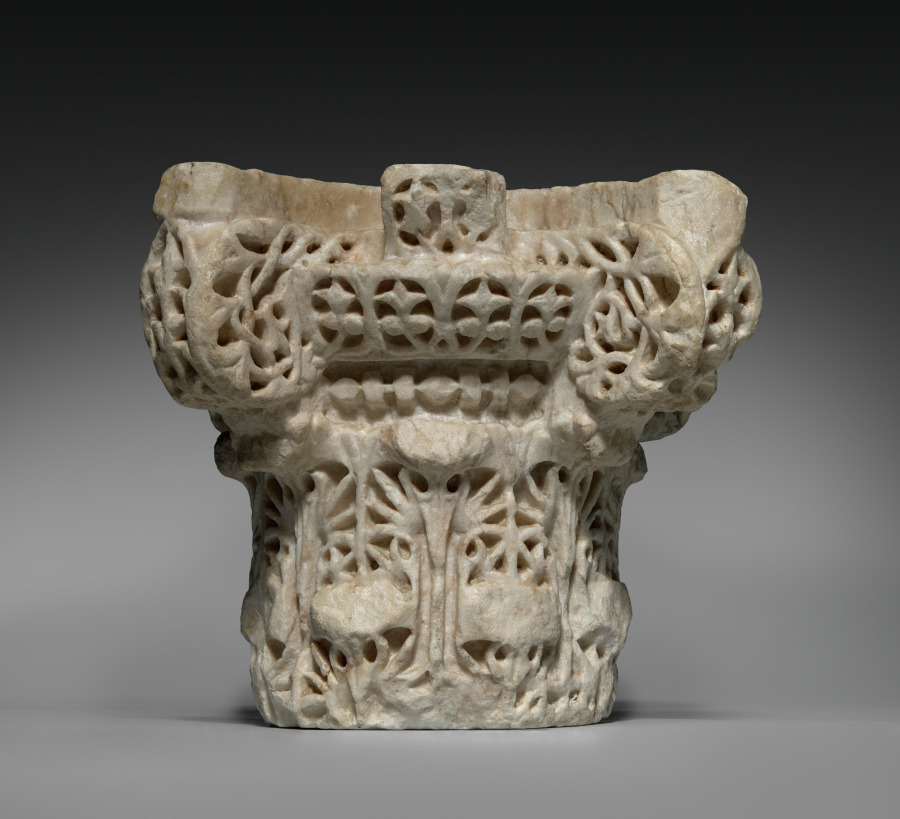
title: Column Capital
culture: Spain, Cordoba, Madinat al-Zahra, Spanish Umayyad period (756–1031)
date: c. 960–76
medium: Marble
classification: Sculpture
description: This capital comes from the palatial city of Madinat al-Zahra near Cordoba (Spain) which was begun by caliph Abd al-Rahman III (r. 912–61) around 936. Large parts of the Iberian Peninsula were then under Islamic rule and experienced a cultural flowering. The city, destroyed already in 1010, was the most magnificent palace complex in Europe at the time.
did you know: In the mid-1800s the ruins of Madinat al-Zahra were rediscovered and became the source of great fascination as people imagined a palace like that in the stories of One Thousand and One Nights.